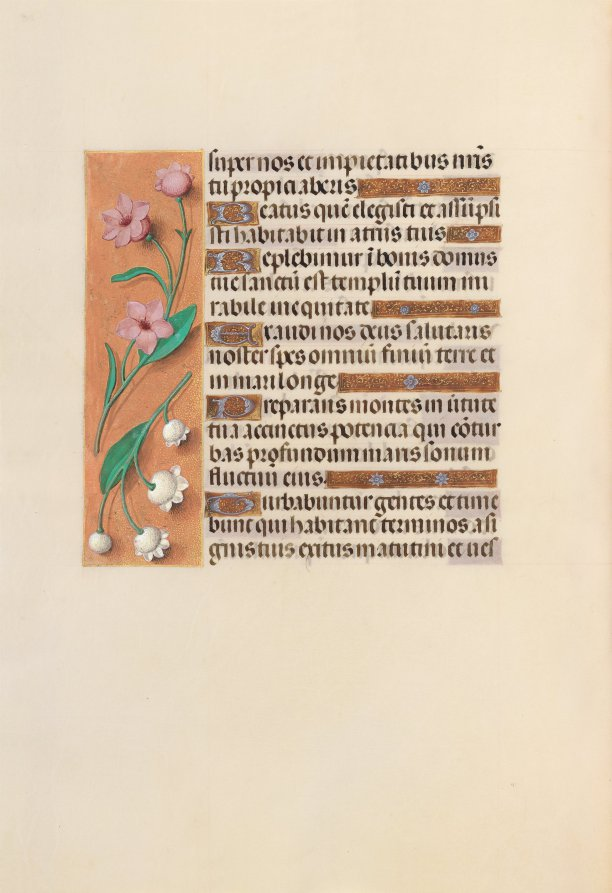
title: Hours of Queen Isabella the Catholic, Queen of Spain: Fol. 248v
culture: Flanders, Ghent and Bruges, late 15th century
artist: Master of the First Prayerbook of Maximillian (Flemish, c. 1444–1519)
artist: and Associates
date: c. 1500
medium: ink, tempera, and gold on vellum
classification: Bound Volume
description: This manuscript was illuminated by a circle of at least five highly organized manuscript painters active in the Flemish cities of Ghent and Bruges. The principal illuminator was Alexander Bening, who painted the majority of the book's miniatures. Manuscripts produced by this circle of artists are renowned for the decoration of their borders, which typically feature a rich variety of realistically-painted flowers, birds, and butterflies. This prayer book, called a book of hours, was intended not for a cleric, but for the private devotions of a lay person-in this case, Isabella the Catholic, Queen of Spain (1451-1504). Isabella's coat of arms embellishes the book's frontispiece. It is unlikely that the book was commissioned by the Queen herself; rather, she probably received it as a diplomatic gift from someone courting her patronage, perhaps Cardinal Francisco Jimenez de Cisneros. A Franciscan friar, Jimenez was dependent upon Isabella for his advancement, first to the post of Queen's confessor in 1492, and then to Archbishop of Toledo in 1495.